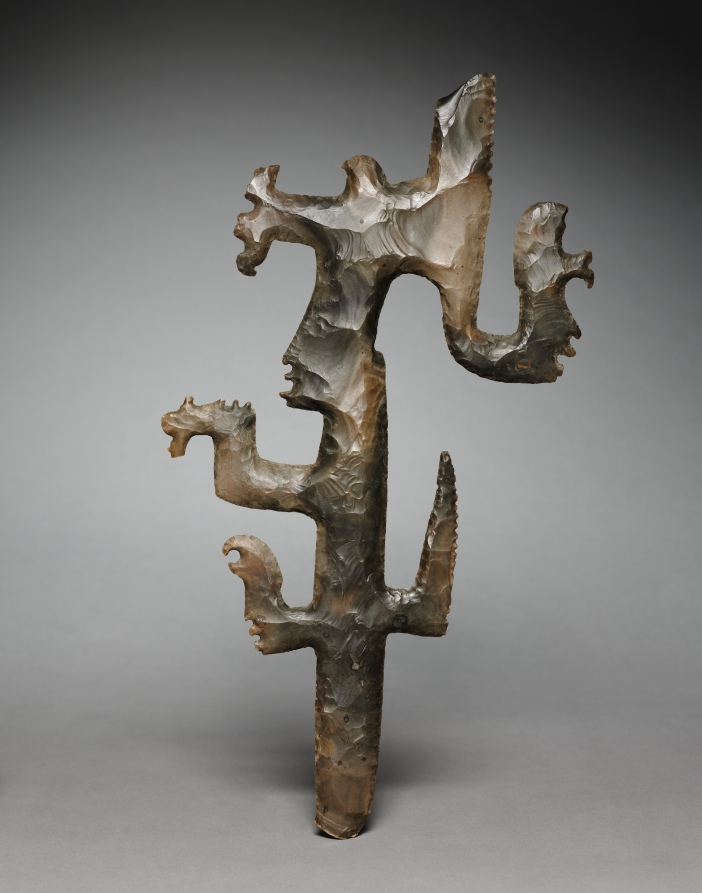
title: Eccentric Flint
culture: Guatemala, Quirigua, Maya style (250-900)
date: 600–900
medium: chipped flint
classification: Stone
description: Named for their unusual shapes, eccentric flints often have intricately silhouetted figures like this. At the forehead of the main profile face is a smoking torch, the insignia of a deity closely linked to rulers and known today as K’awil. Smaller faces appear on three protrusions. Some flints may have served as scepters; they also were buried as offerings beneath buildings and sculptures.